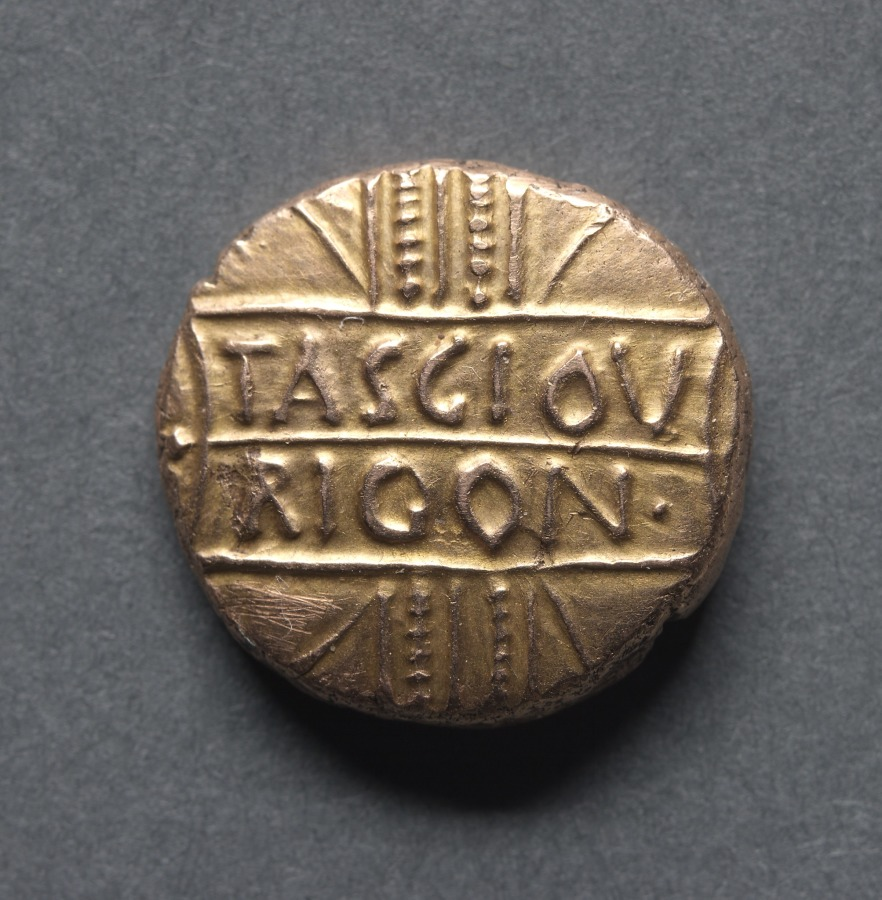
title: Tasciovanus Stater: Wreath (obverse); Horse and Armed Rider (reverse)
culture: England, Catuvellauni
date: c. 20 BCE–10 CE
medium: gold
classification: Coins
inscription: TASCIOV RICON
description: The clarity of the obverse legend sets this piece beyond all doubt. The meaning of RICON, which on some other specimens occurs as RICONI or RIGON, is uncertain. Some authorities believe it to be the Celtic form of REX or king. A high quality or workmanship, the horse has a clear, three-dimensional appearance. The warrior's cuirass is a point of interest as it may show mail being used. The warrior's shield is on his outstretched left arm, trailing behind the horse as the rider turns in his saddle, probably encouraging his army.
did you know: The name Tasciovanos is only known through coin and appears to have become king of the Catuvellauni around 20 BC.